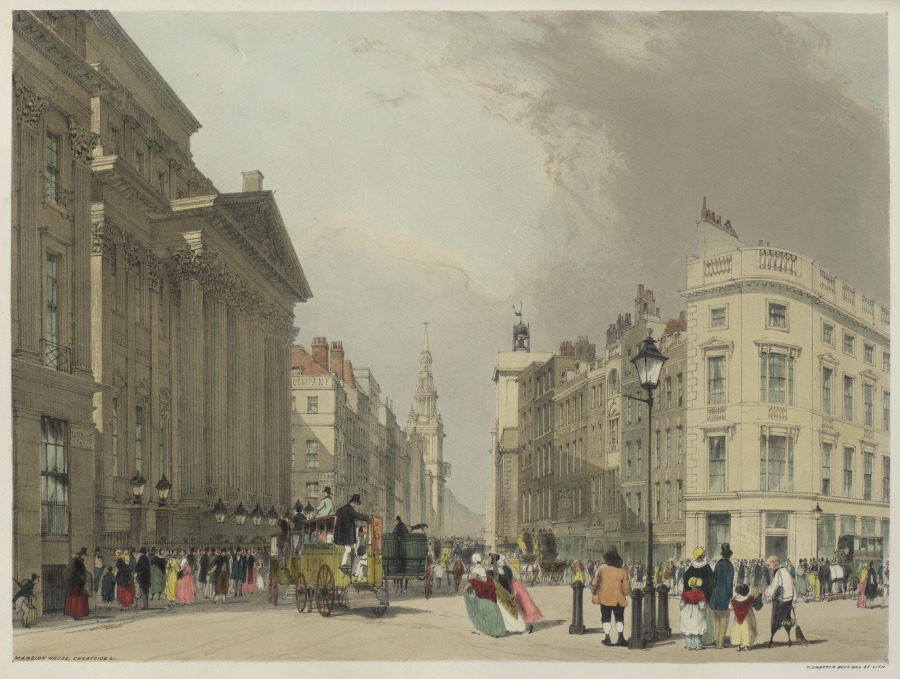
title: London As It Is: Mansion House, Cheapside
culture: England, 19th century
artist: Thomas Shotter Boys (British, 1803–1874)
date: 1842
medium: lithograph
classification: Bound Volume